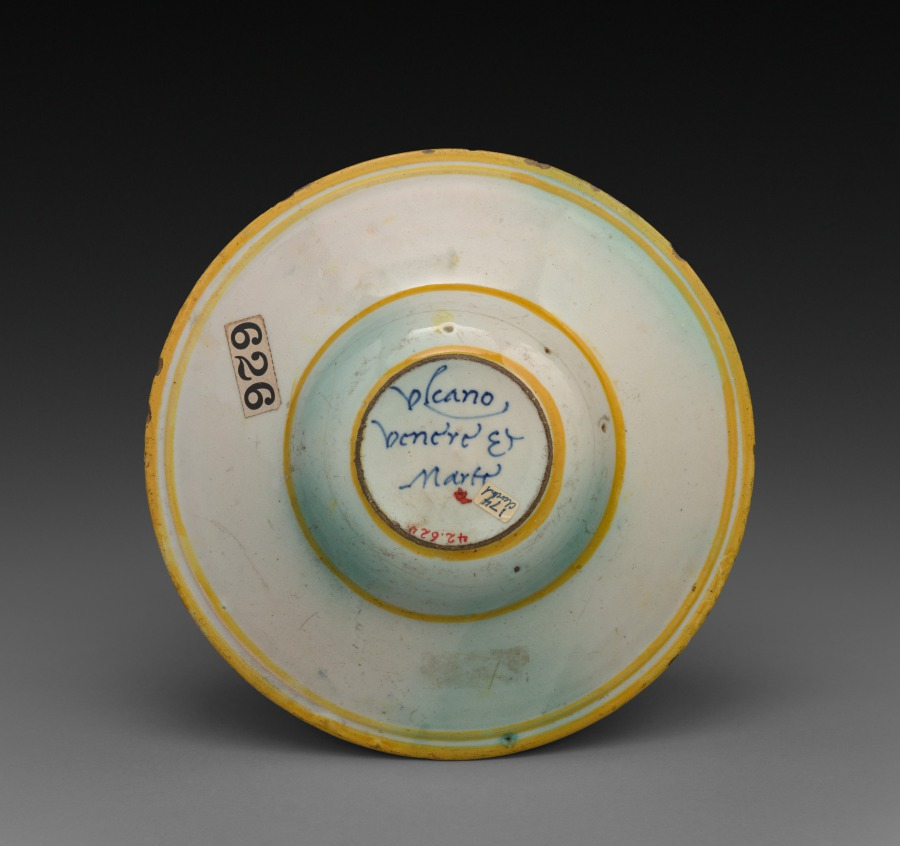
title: Plate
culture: Italy, Pesaro, 16th century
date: c. 1540–1544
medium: tin-glazed earthenware (maiolica)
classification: Ceramic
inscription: on back, in blue: "Vulcano Venere et Marte" (Vulcan Venus and Mars).